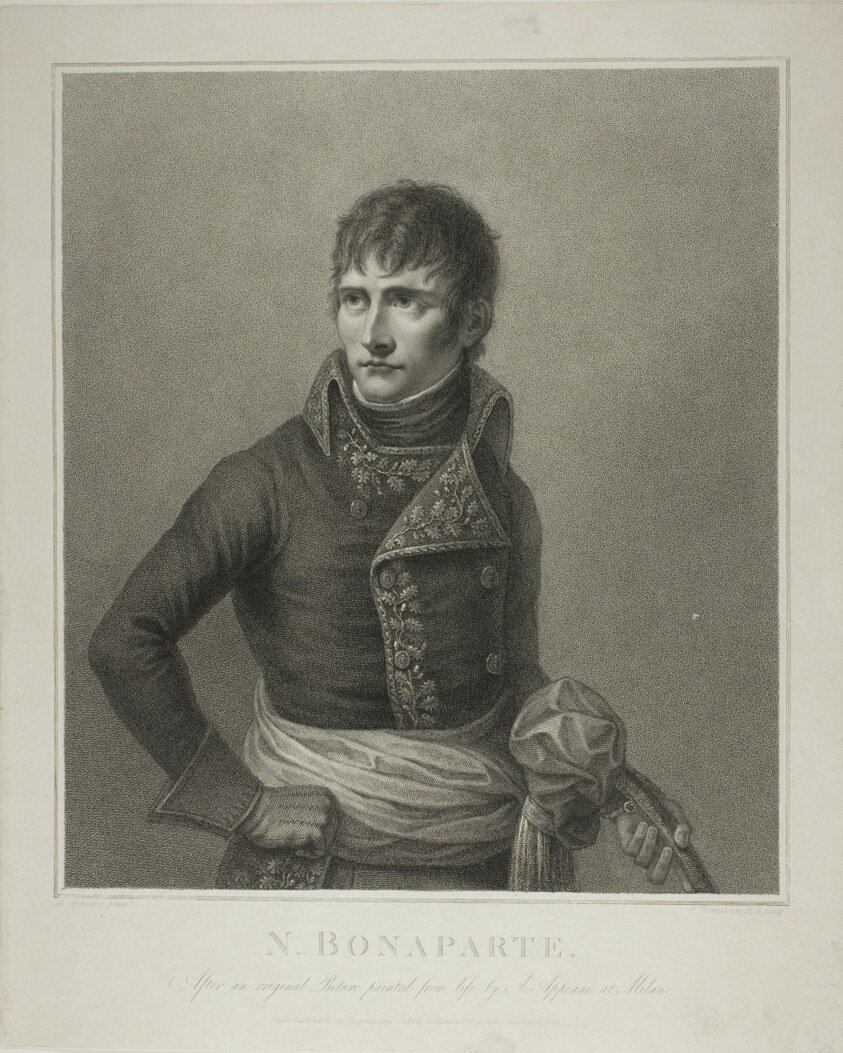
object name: Print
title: Napoléon Bonaparte, First Counsel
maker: Francesco Bartolozzi (Italian, 1727-1815); Andrea Appiani the elder (Italian, 1754-1817)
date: published June 10, 1802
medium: Engraving and stipple engraving on ivory wove paper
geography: Italy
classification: engraving; print; prints and drawing